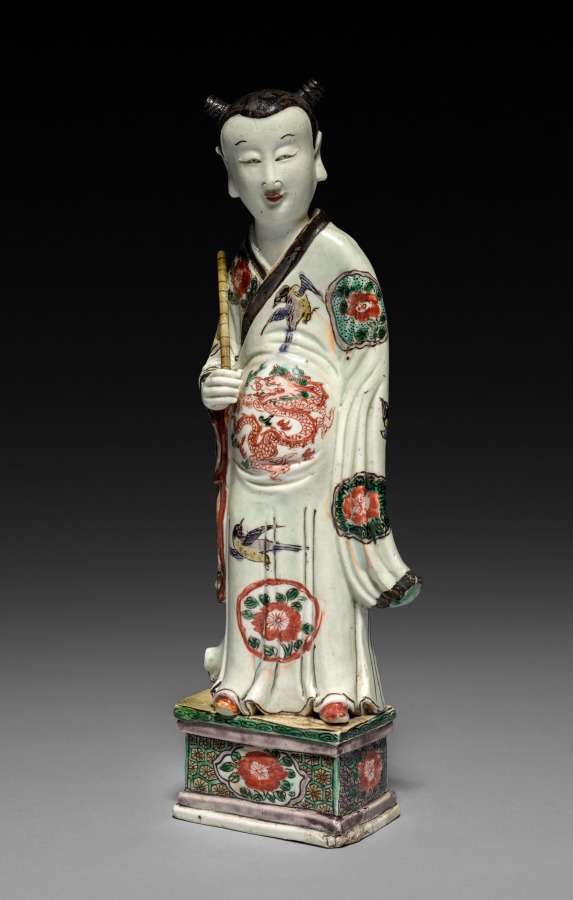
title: Daoist Immortal Han Xiangzi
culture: China, Jiangxi province, Jingdezhen kilns, Qing dynasty (1644-1911), Kangxi reign (1662-1722)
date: 1662–1722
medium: porcelain with famille verte overglaze enamel decoration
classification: Ceramic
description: One of the Eight Immortals, Han Xiangzi was said to be the nephew of the famous Tang dynasty poet Han Yu (768–824). He is usually shown as a young boy holding a flute. Han is wearing a white robe decorated with peonies, hinting at his identity as the patron of florists and his legendary ability to make peonies bloom in winter. A four-clawed dragon, a decorative motif typically used for imperial nobility and certain high-ranking officials, decorates Han’s robe.